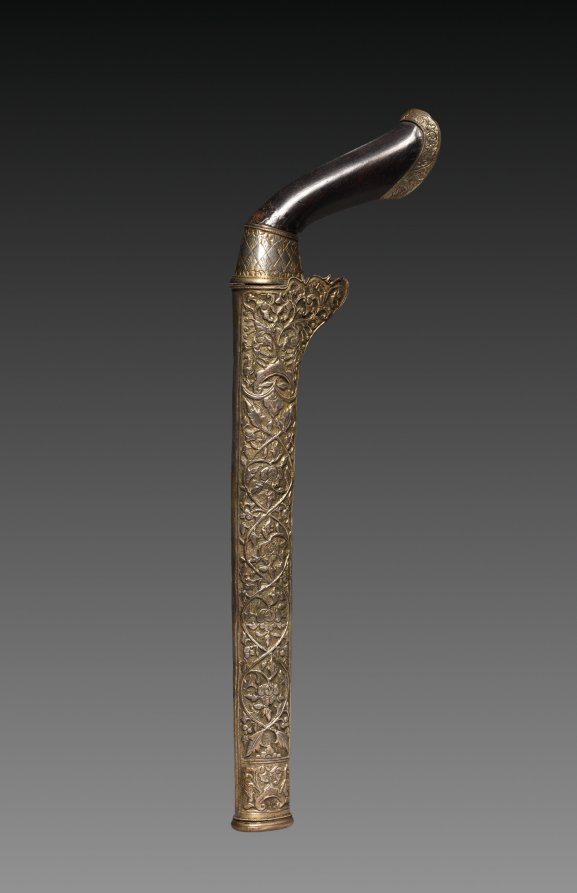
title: Knife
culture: Sumatra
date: 1500s–1800s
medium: Blade: damascened steel; handle: wood, bronze, and gilt silver fittings; scabbard: gilt silver with wood core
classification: Arms and Armor